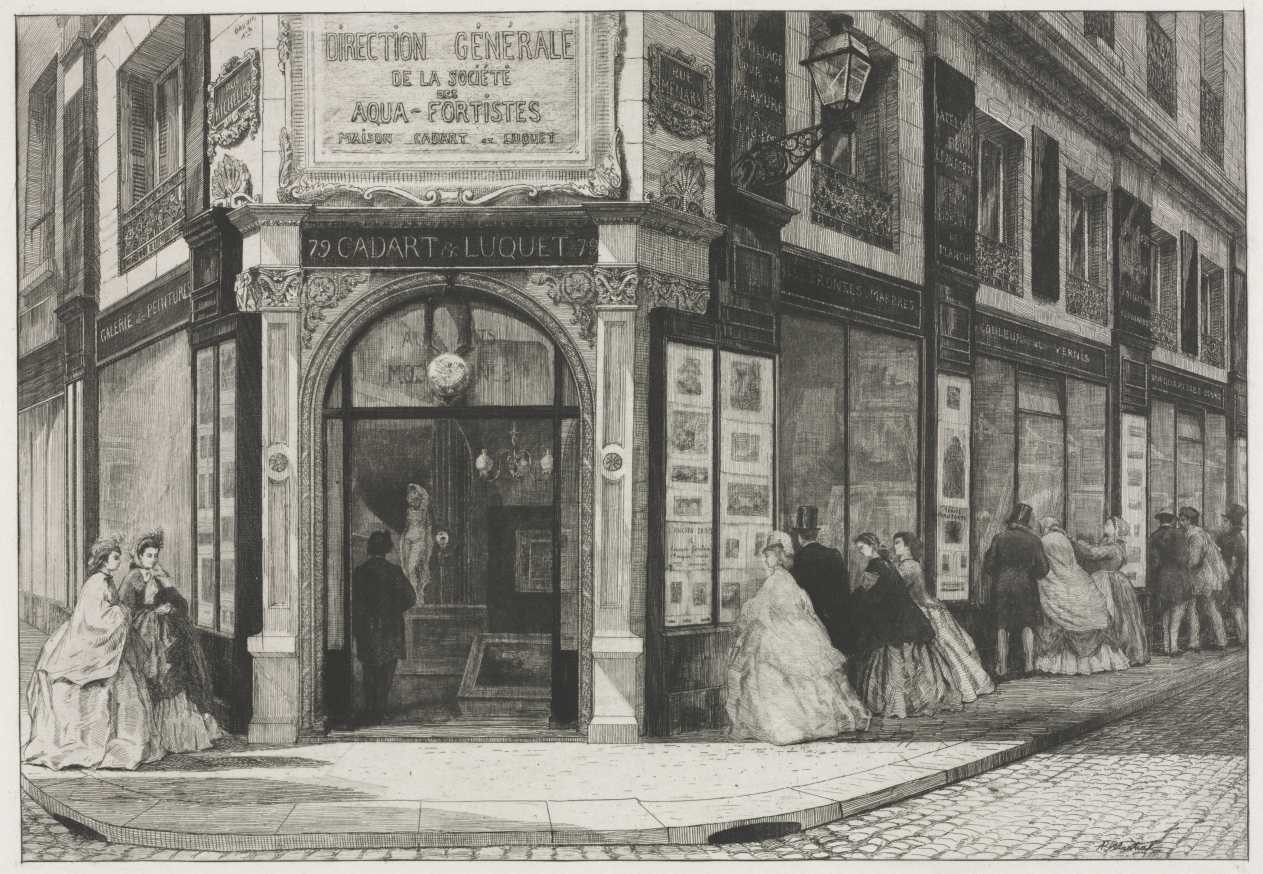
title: Headquarters of the Société des Aquafortistes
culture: France, 19th century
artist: Adolphe Théodore Jules Martial Potémont (French, 1828–1883)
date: 1864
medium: etching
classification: Print